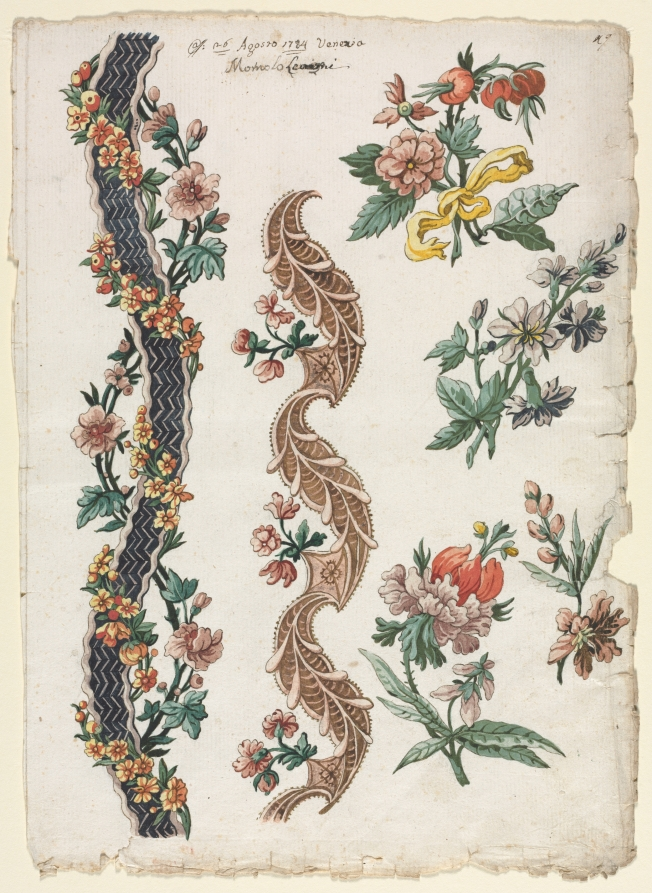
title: Floral Designs and Floral Bands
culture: Italy, 18th century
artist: Giacomo Cavenezia (Italian)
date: 1784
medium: pen and brown ink, brush and brown and black wash, watercolor and gouache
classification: Drawing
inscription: by artist, upper center, in brown ink: @ [underlined twice]: 26 [underlined twice] Agosto 1784 [1784 underlined twice; altered from 1774] Venezia / Momolo Lea[illegible]ni [strengthened in black ink] ; by artist, upper right, in brown ink: [n?]9